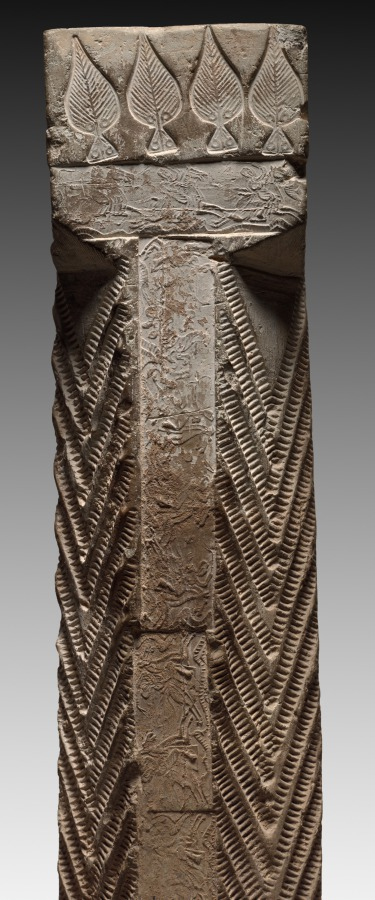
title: Hollow Tile: Column from Tomb-Chamber Doorway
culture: China, Han dynasty (202 BCE–220 CE)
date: 100–200 CE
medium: earthenware, die-stamped relief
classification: Ceramic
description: Striding tigers (top), racing horsemen (right column), and reverent officials (left column) are stamped into the surface of this underground portal to a tomb. The doorway preserves in stone the post-and-lintel structure, a basic element of Chinese wooden architecture. By the first century CE, a revolution in Chinese tomb construction and furnishing had taken place. Tombs lined with decorated bricks and tiles replace the earlier tombs constructed with only rammed-earth walls. Ceramic surrogates or models of stoves, houses, servants, and pets filled these more durable chambers, symbolically extending the creature comforts of this world into the world after death.